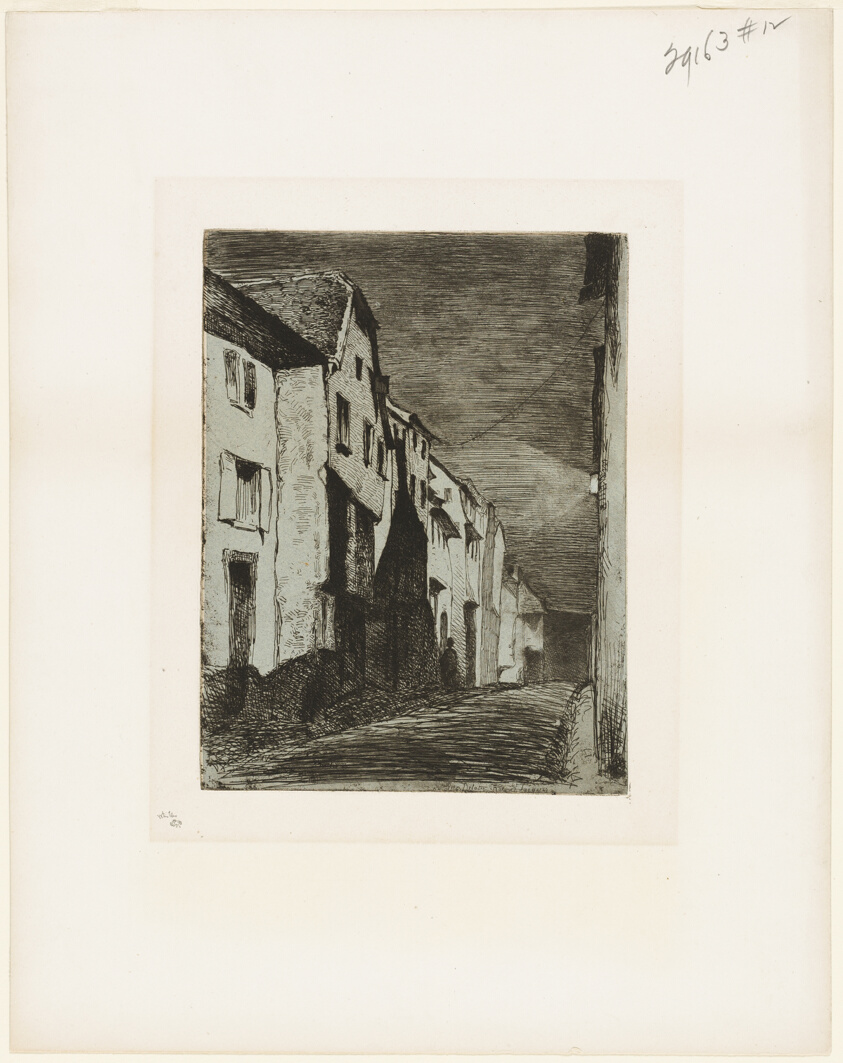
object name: Print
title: Street at Saverne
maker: James McNeill Whistler (American, 1834-1903)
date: 1858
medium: Etching with foul biting in black ink on light blue wove paper laid down on off-white wove paper (chine collé)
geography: United States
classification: etching; foul biting; print; prints and drawing; paper